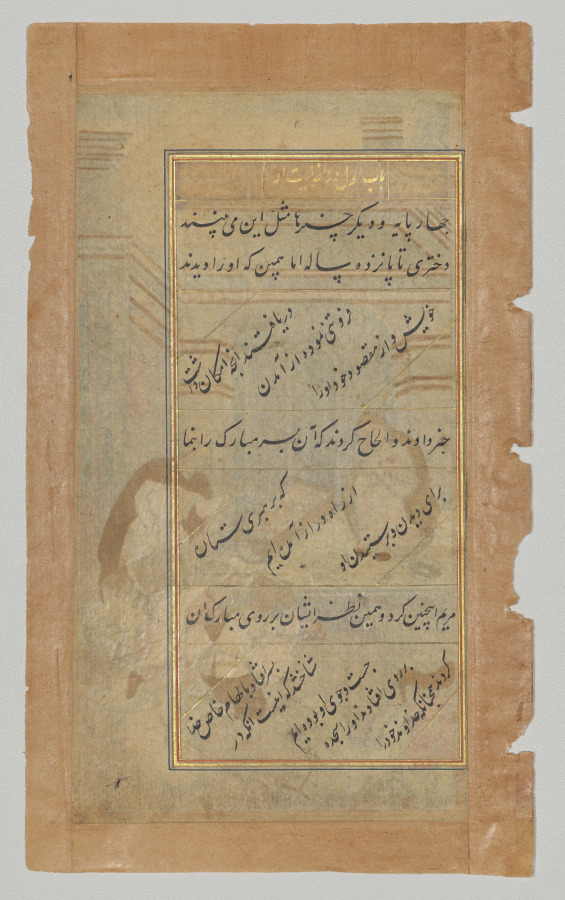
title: The Adoration of the Magi, from a Mirror of Holiness (Mir’at al-quds) of Father Jerome Xavier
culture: Northern India, Uttar Pradesh, Allahabad, Mughal period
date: 1602–4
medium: Gum tempera, ink, and gold on paper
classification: Manuscript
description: In this Nativity scene, familiar in Christian contexts, Mary and Joseph present the infant Jesus to the three Magi, who have placed their crowns on the ground in homage to the King of Kings. The three Magi are portrayed in Portuguese costumes to indicate to a Mughal audience that they are foreigners who believed in Christ. The artist cleverly and humorously indicates that the Magi have just arrived in Bethlehem by depicting their three camels in the bottom corner. One exhausted camel’s tongue hangs out the side of his mouth, while the other two animals lean eagerly toward a pair of water jugs.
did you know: The books next to newborn Jesus indicate that his birth fulfills a prophecy.